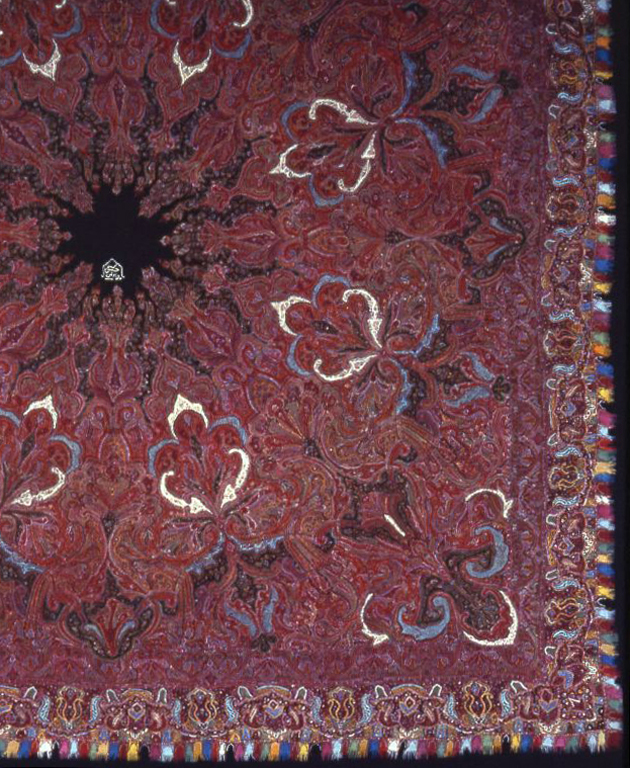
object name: Costume and Accessories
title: Shawl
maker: India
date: 1867/77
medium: Wool, patchwork of double interlocking 2:2 'S' twill tapestry weaves; outer border and "Harlequin" tabs of patchwork in 2:2 'S' and 'Z' twill weaves; embroidered in feather, fly, satin, and stem stitches; couching; warp fringe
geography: India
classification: textile; weaving; costume